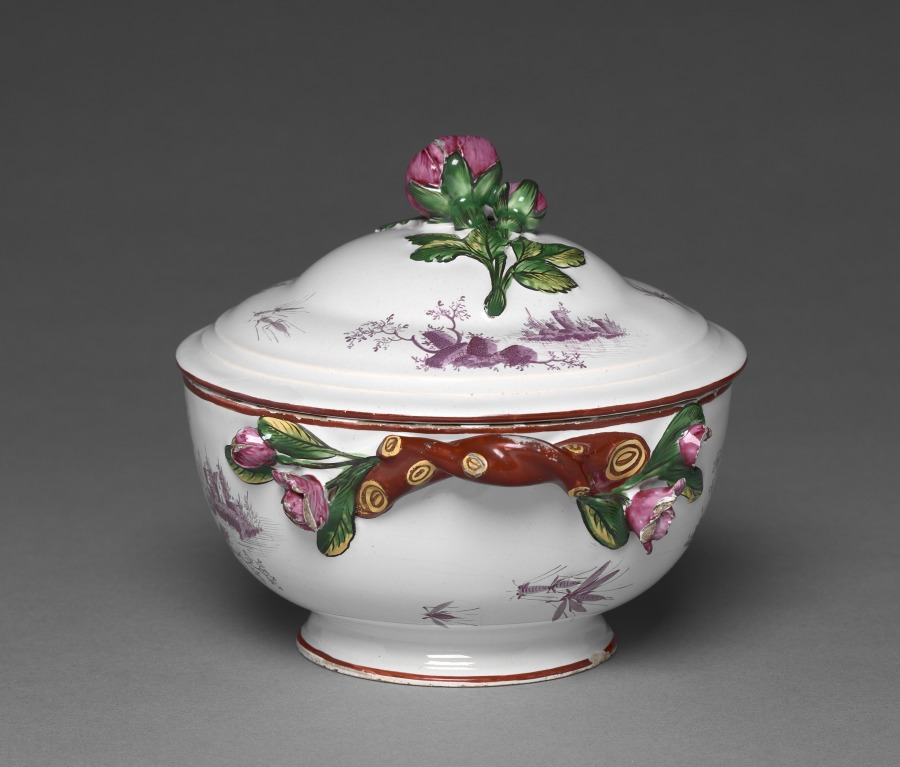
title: Covered Bowl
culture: France, 18th century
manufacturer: Saint-Clément Factory (French)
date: c. 1775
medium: tin-glazed earthenware (faience) with enamel decoration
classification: Ceramic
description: The faience factory at Saint-Clément in eastern France closely imitated the styles and techniques employed by the Hannong's at Strasbourg. The monochrome landscapes in red on this covered bowl demonstrate the influence of German, in this case Meissen, porcelain on the faience made in this part of France.